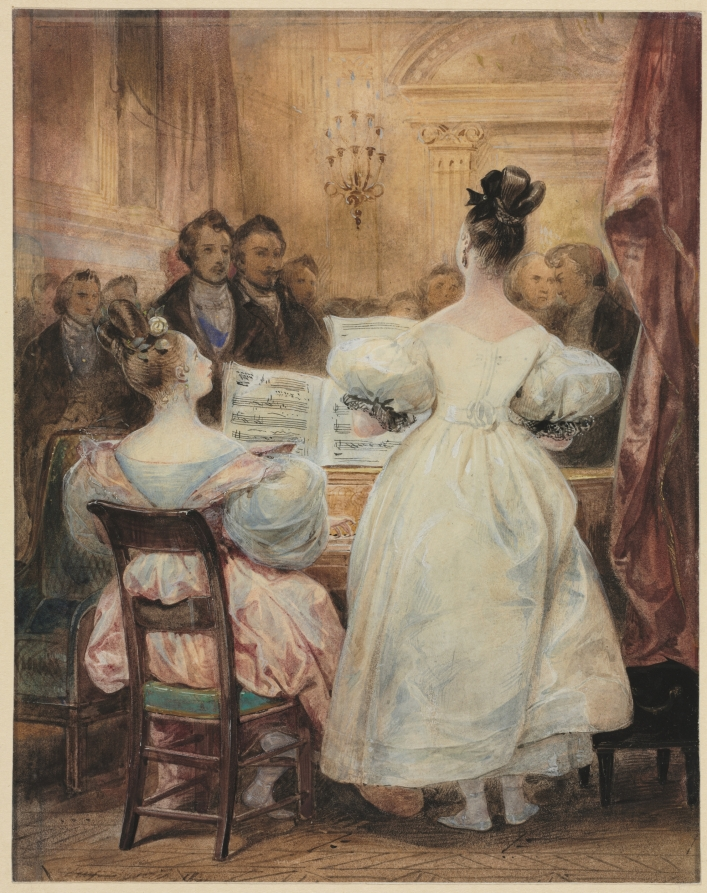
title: A Concert: Laura Devéria Singing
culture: France, 19th century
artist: Eugène François Marie Joseph Devéria (French, 1805–1865)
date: 1831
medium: watercolor with black and brown ink, some pastel and lead white on off-white heavy-weight wove paper mounted to heavy white cream wove paper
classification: Drawing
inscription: Signed and dated, lower left in brown ink: Eug. Deveria 1831